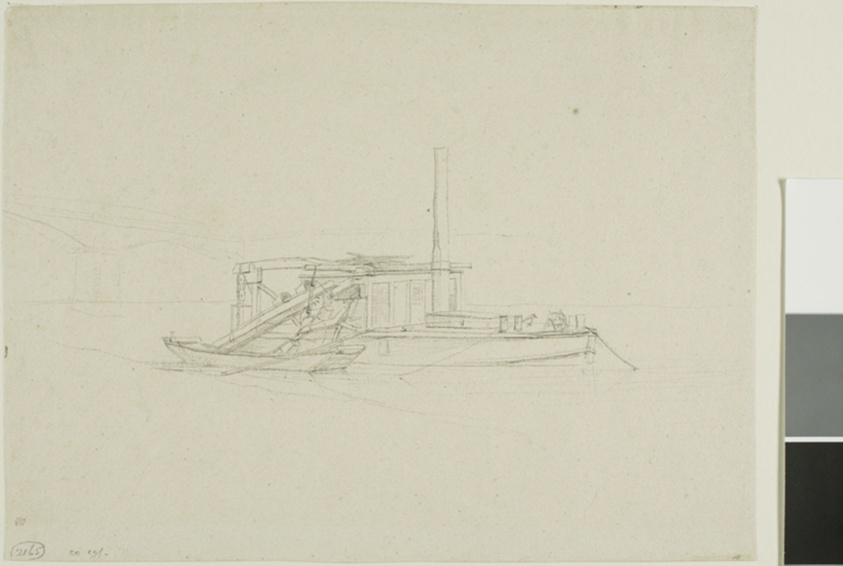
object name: Drawing and Watercolor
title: A Dredge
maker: Charles Meryon (French, 1821-1868)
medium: Graphite on buff laid paper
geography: France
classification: graphite; drawings (visual works); prints and drawing